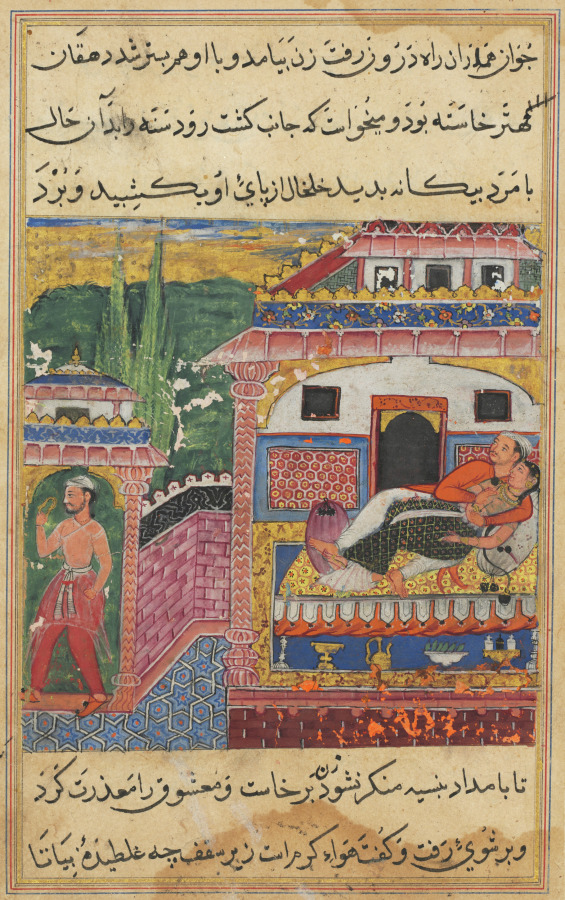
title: The farmer, father of the son with the deceitful wife, steals away with her anklet while she is in bed with her lover, from a Tuti-nama (Tales of a Parrot): Eighth Night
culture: Mughal India, court of Akbar (reigned 1556–1605)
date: c. 1560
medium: gum tempera, ink, and gold on paper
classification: Painting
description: The unfaithful wife and her lover were discovered by her father-in-law in their rendezvous place. Thinking she was asleep, he took her anklet as evidence of her infidelity, planning to confront her with it later. The lovers, still in bed, were awakened and witnessed him leaving by the gate, holding her anklet. Under the bed are a pitcher and basin for water, a dish of breath-freshening and mildly narcotic pan leaves, along with bottles of perfumes, all the accoutrements for a romantic encounter.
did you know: Areas of the original, orange paint are visible beneath the lovers’ bed.